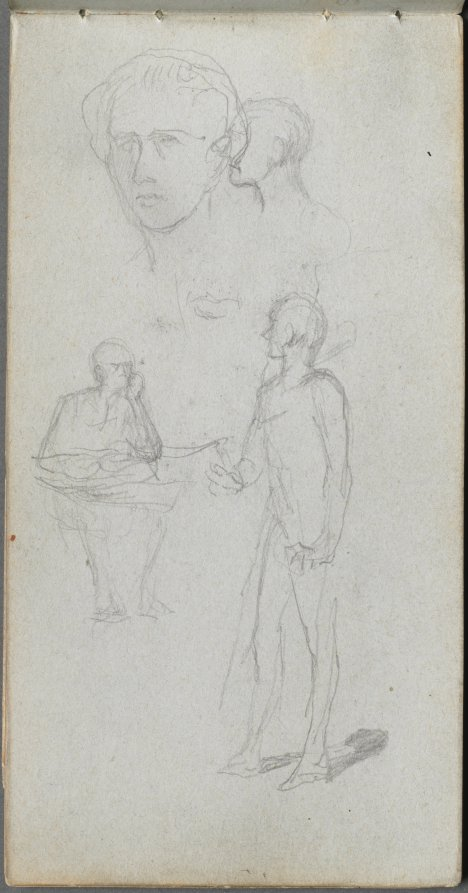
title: Sketchbook, page 12: Multiple Figures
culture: France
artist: Ernest Meissonier (French, 1815–1891)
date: c. 1860s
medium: graphite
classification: Bound Volume